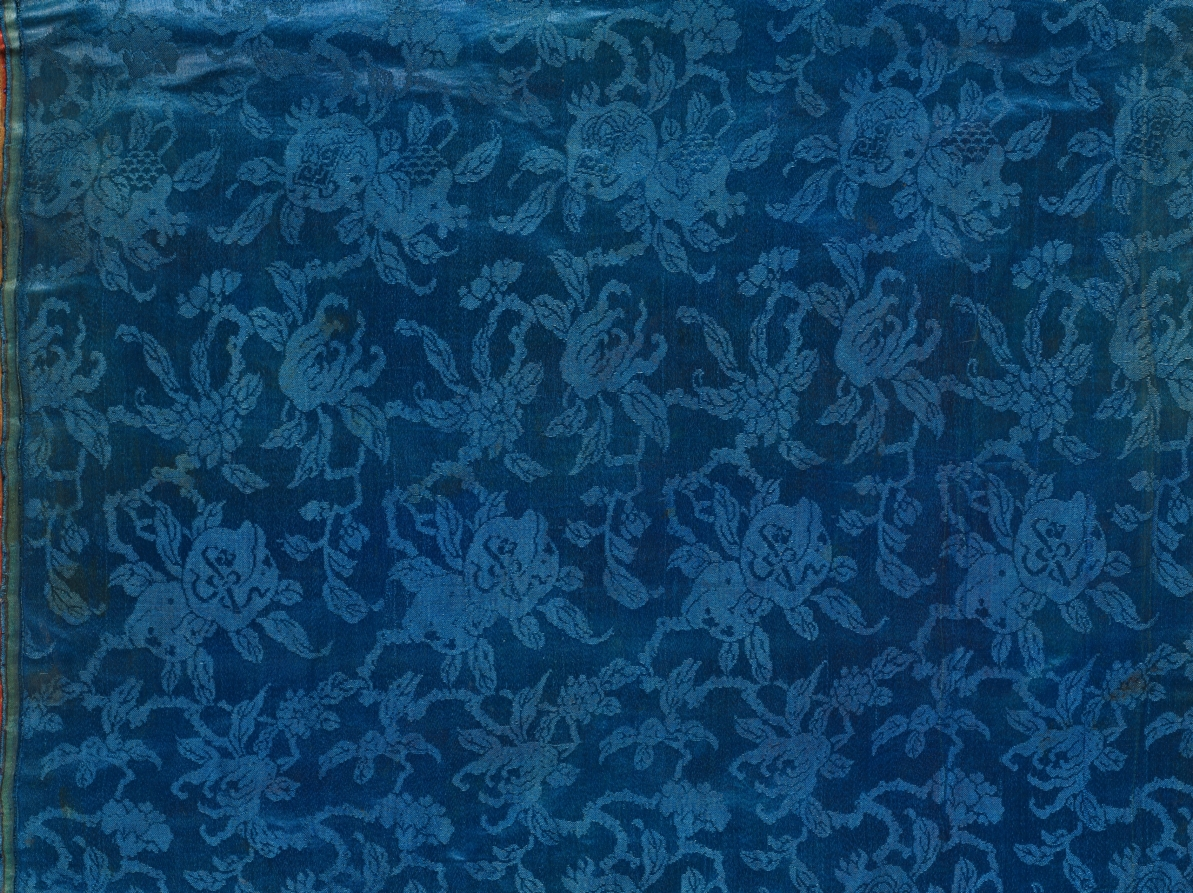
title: Bridal Robe (Hwarot)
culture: Korea, Joseon dynasty (1392–1910)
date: late 1800s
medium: Silk: satin weave; embroidery; paper edging on neck and sleeves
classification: Garment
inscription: 壽如河海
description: This bride's robe is exquisitely embroidered with various symbols of happiness in colorful silk threads. Butterflies stand for marital happiness; the phoenix, numerous offspring; and lotus flowers and white cranes, longevity. Yet, the bridal robe does not attest to the life of luxury. To the contrary, many traces of repairs, trimmings, and patchwork, reflect Joseon period women’s commitment to value neo-Confucian aesthetics of frugality and modesty. Substantial repairs and patching reveal that this robe served as an important communal resource to be shared and passed down through several generations. Its collar and sleeves are covered in thick white paper; this paper is replaced with new paper for each bride, while the robe itself was reused for decades.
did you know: This bride's robe is made of densely embroidered silk, but its collar and sleeves are covered in thick paper.